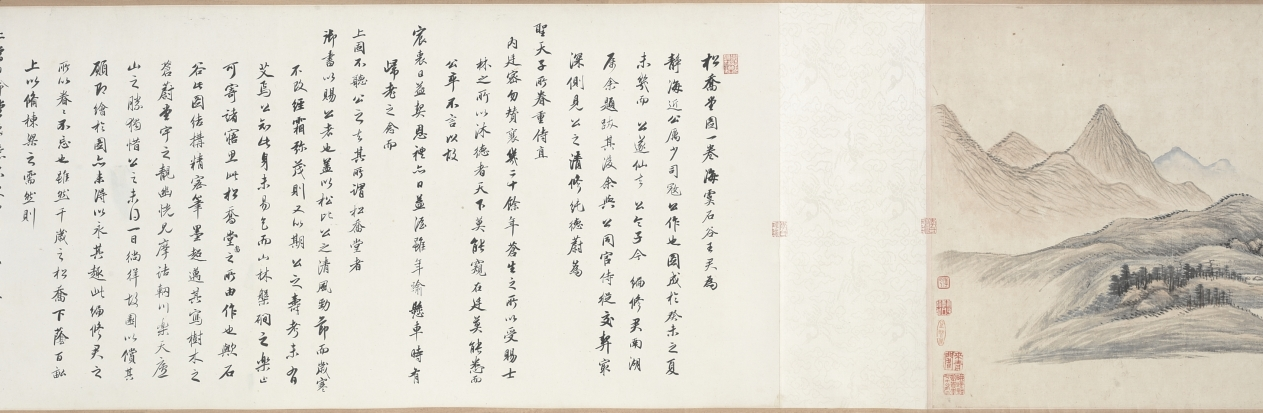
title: Hall of Lofty Pines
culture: China, Qing dynasty (1644-1911)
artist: Wang Hui (Chinese, 1632–1717)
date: 1703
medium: handscroll; ink and color on paper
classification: Painting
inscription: [題] 松喬堂圖 康熙癸未夏六月, 海虞耕煙散人王翬畫。[印]王翬之印; 石谷. [左下] 來青閣; 耕煙野老時年七十有二.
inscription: 松喬堂圖一卷，海虞石谷王君為靜海近公厲少司冦公作也。圖成于癸未之夏。未幾而公遂仙去。公令子今編修君南湖屬余題跋其後。余與公同官侍從，交契最深。側見公之清修純德，蔚為聖天子所眷重。侍直內廷，密勿贊襄，幾二十餘年。蒼生之所以受賜，士林之所以沐德者，天下莫能窺，在廷莫能悉。而公卒不言。以故宸衷日益契，恩禮亦日益渥。雖年逾懸車，時有歸老之念。而上固不聼公之去。其所謂松喬堂者，御書以賜公者也。蓋以松比公之清風勁節，而歲寒不改，經霜彌茂。則又以期公之壽考未有艾焉。公知此身未易乞，而山林槃磵之樂，止可寄諸寤思。此松喬堂圖之所由作也歟。石谷此圖，結構精密，筆墨超邁。其寫樹木之蒼蔚，堂宇之靚幽。恍見摩詰輞川樂天廬山之勝。獨惜公未得一日徜徉故園以償其願。即繪於圖亦未得以永其趣，此編修君之所以眷眷不忘也。雖然千歳之松喬，下蔭百畝，上以修棟梁之需。然則上當日名堂之意，不更望於後之人襲其芘而養其材也哉。吾願編修君之寶斯圖。并望君之塗塈丹雘，大其堂構也已矣。 康熈丙戍重陽三日，雲間王鴻緒跋。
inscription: 10 additional seals: 1 seal of Li Duna 勵杜納 (1628–1703); 4 seals of Zha Ying 查瑩 (jinshi of 1766); 5 seals of Li Yun (dates unknown).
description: Wang Hui 王翬, a leading painter in the orthodox school of the early Qing dynasty (1644–1911), was commissioned to paint this landscape with a country estate for Li Duna 勵杜納 (1628–1703), vice minister of justice in Emperor Kangxi’s court. The emperor had honored Li by granting him a piece of calligraphy with the name of Li’s retirement retreat, “Hall of Lofty Pines.” He drew a comparison between pines and Li’s upright character, resilience, and longevity. Wang Hui’s painting was supposed to allow Li to imagine living in a beautiful, secluded compound among the hills and pines. Sadly, Li died before seeing the completed painting and before receiving the emperor’s permission to retire. The landscape begins with peaceful riverbanks and low hills. The pines around the estate in the middle of the handscroll are truly lofty, some stretching even beyond the frame of the painting. Li Duna, the estate’s owner, is shown twice in his serene mountain retreat: first approaching the entrance to the compound with two servants at the right, and then later in the scroll, to the left, reading in the comfort of an inner room.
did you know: One servant carries the estate owner's carefully wrapped qin, a type of zither.